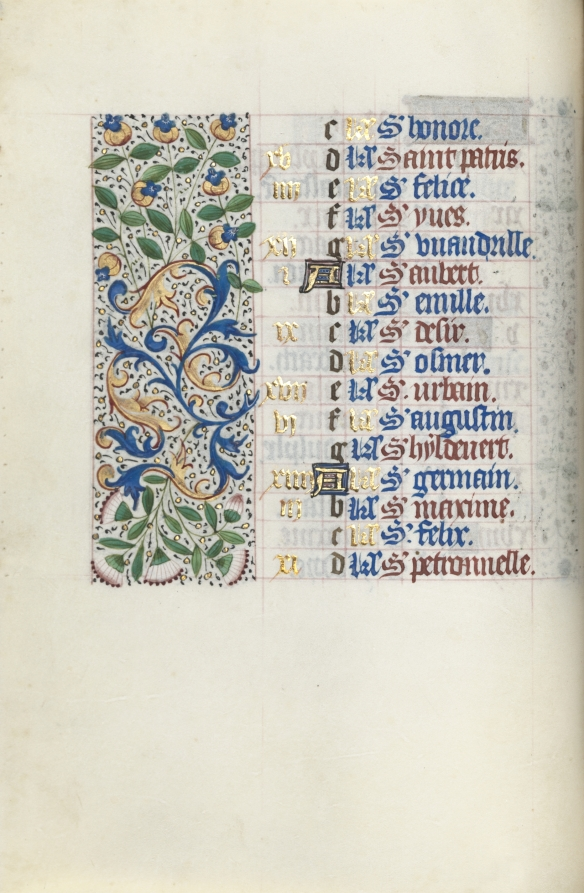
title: Book of Hours (Use of Rouen): fol. 5v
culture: France, Rouen, 15th century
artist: Master of the Geneva Latini (French, active Rouen, 1460–80)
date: c. 1470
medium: ink, tempera, and gold on vellum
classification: Bound Volume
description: In the late 1400s and early 1500s Rouen was an established and important center of book production. The city’s cathedral had a wealthy chapter that spent large sums of money to commission books and to maintain its extensive library. The stationers and booksellers would have likely been concentrated in or near the cathedral precinct. This artist, named after a manuscript now in Geneva, was Rouen’s principal illuminator during the second half of the 1400s.